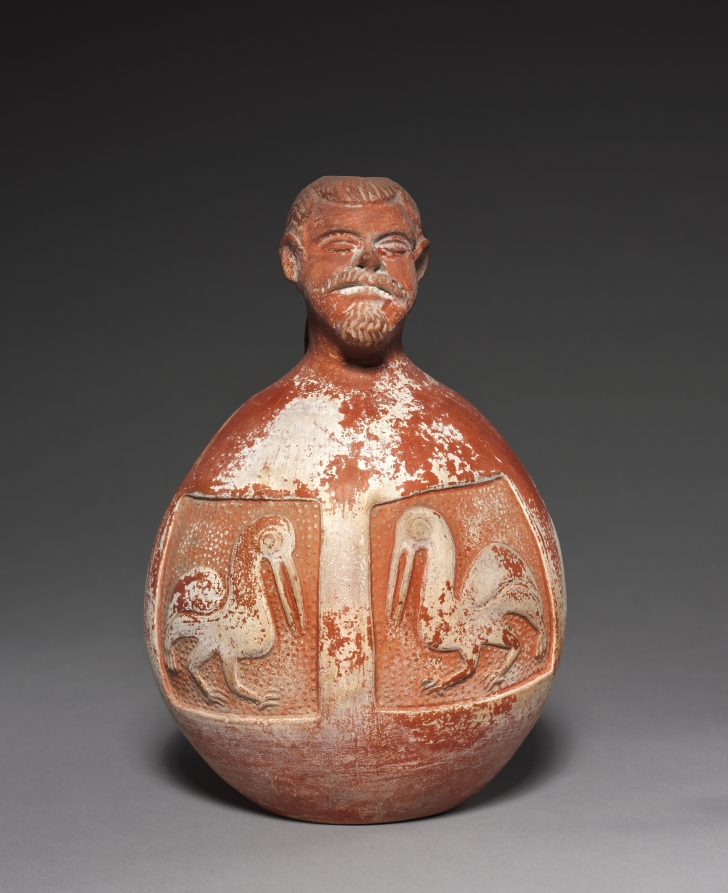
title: Urn or Jug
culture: Peru, 16th century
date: 1532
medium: pottery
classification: Ceramic